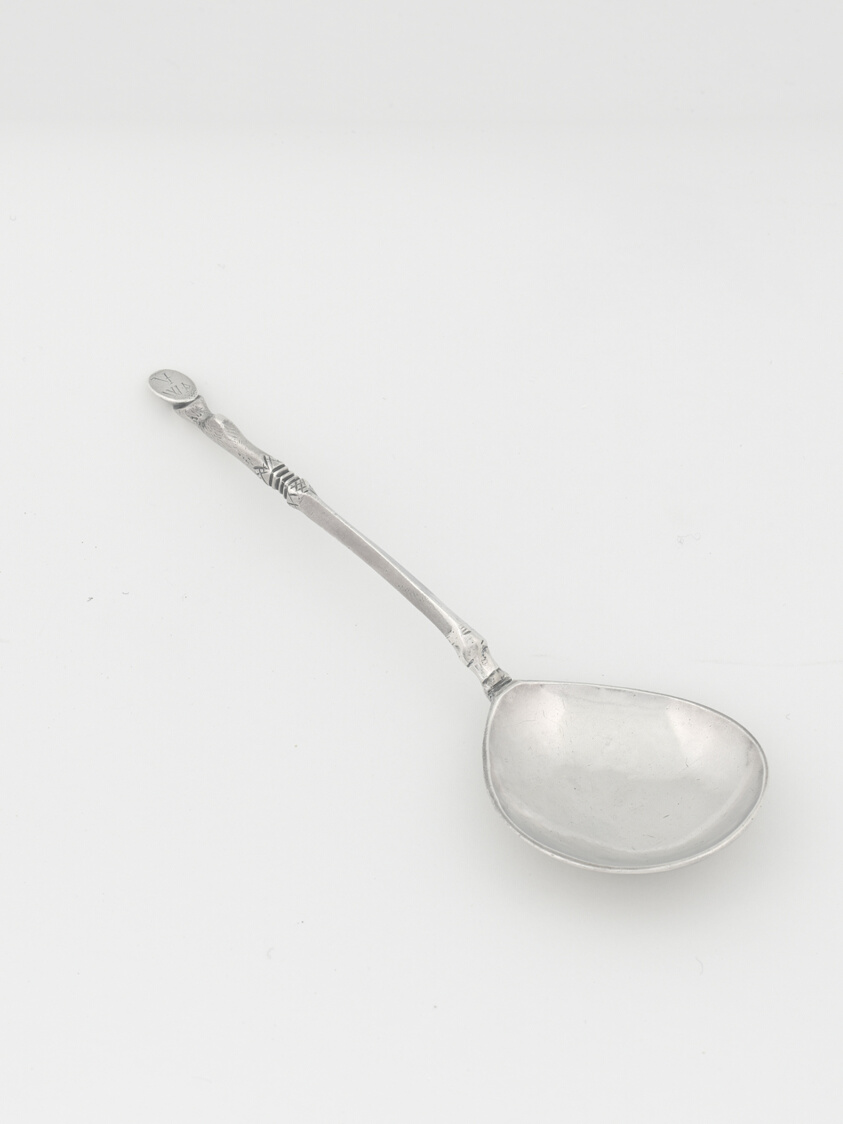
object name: Metalwork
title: Spoon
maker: Jacob Boelen I; American, 1654–1729; New York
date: c. 1696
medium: Silver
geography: New York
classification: spoon; utensil; silver; american decorative arts; american arts; decorative arts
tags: dining, drinking